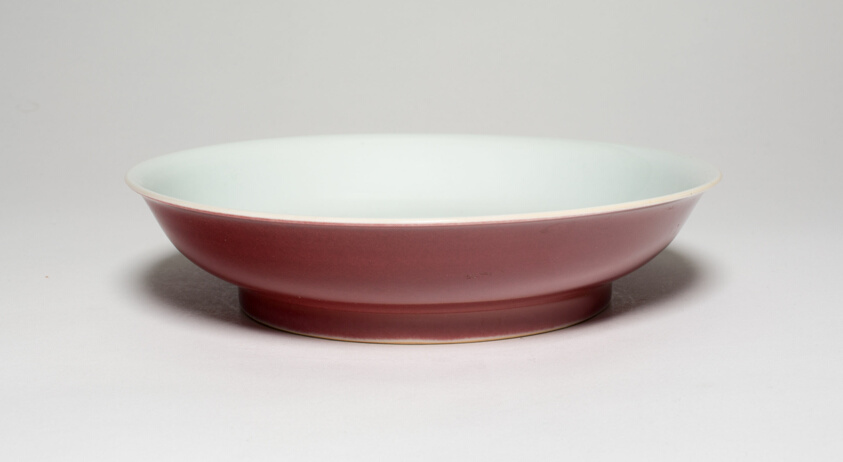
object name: Vessel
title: Dish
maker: China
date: Qing dynasty (1644–1911), Qianlong reign mark and period (1736–1795)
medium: Porcelain with Rose du Barry glaze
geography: China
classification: porcelain; ceramics; asian art